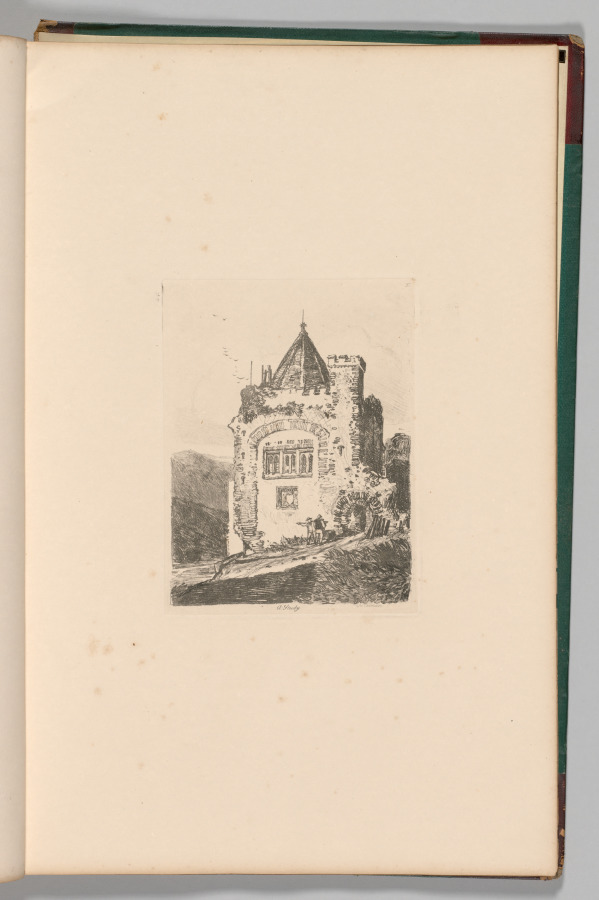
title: Liber Studiorum: Plate 37, A Study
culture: England, 19th century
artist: John Sell Cotman (British, 1782–1842)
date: 1838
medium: softground etching, from a bound volume containing 48 plates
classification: Bound Volume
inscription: In plate, within image, upper right: 37; in plate, below image: A Study J S Cotman